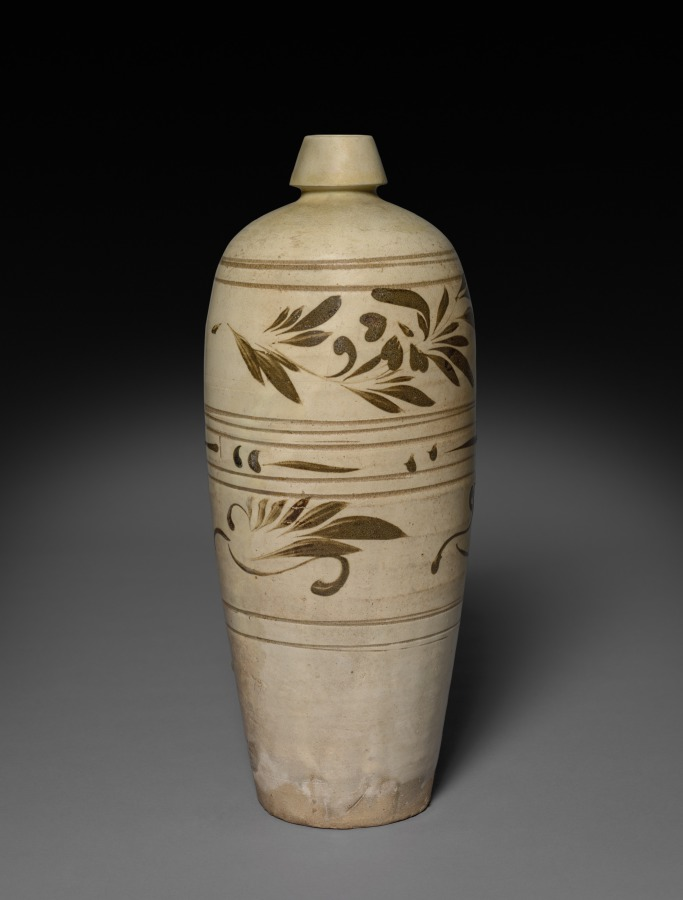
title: Meiping (Plum Blossom) Vase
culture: China, Northern Song dynasty (960-1127) - Jin dynasty (1115-1234)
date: 1100s–1200s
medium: Buff stoneware, slip coated with painted underglaze decoration, Cizhou ware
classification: Ceramic